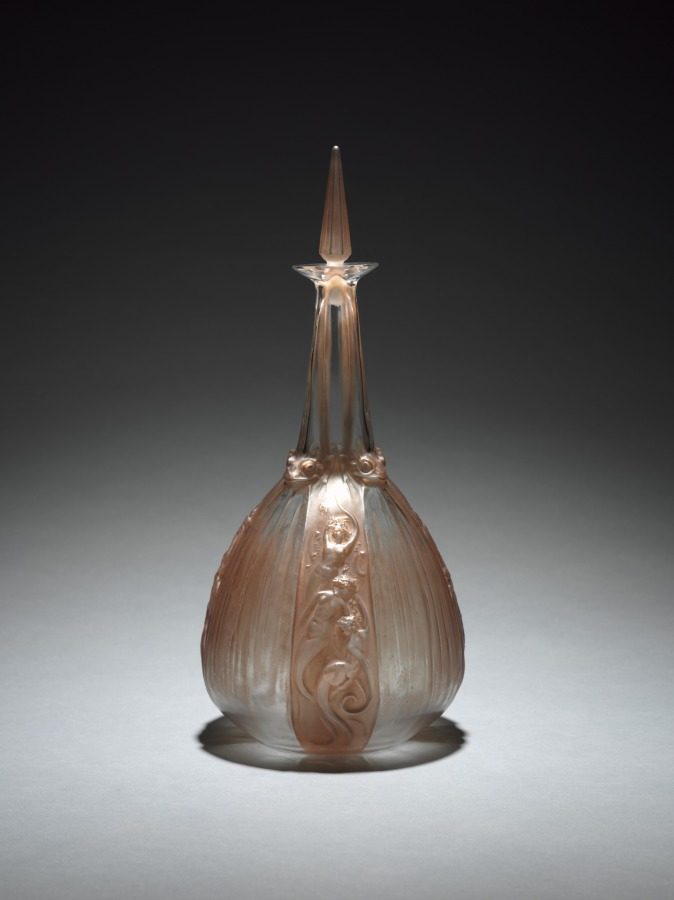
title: Mermaids and Frogs Decanter (Carafe sirènes et grenouilles)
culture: France, 20th century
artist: René Lalique (French, 1860–1945)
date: 1917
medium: glass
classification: Glass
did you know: The title of this work translates to mermaids and frogs carafe.